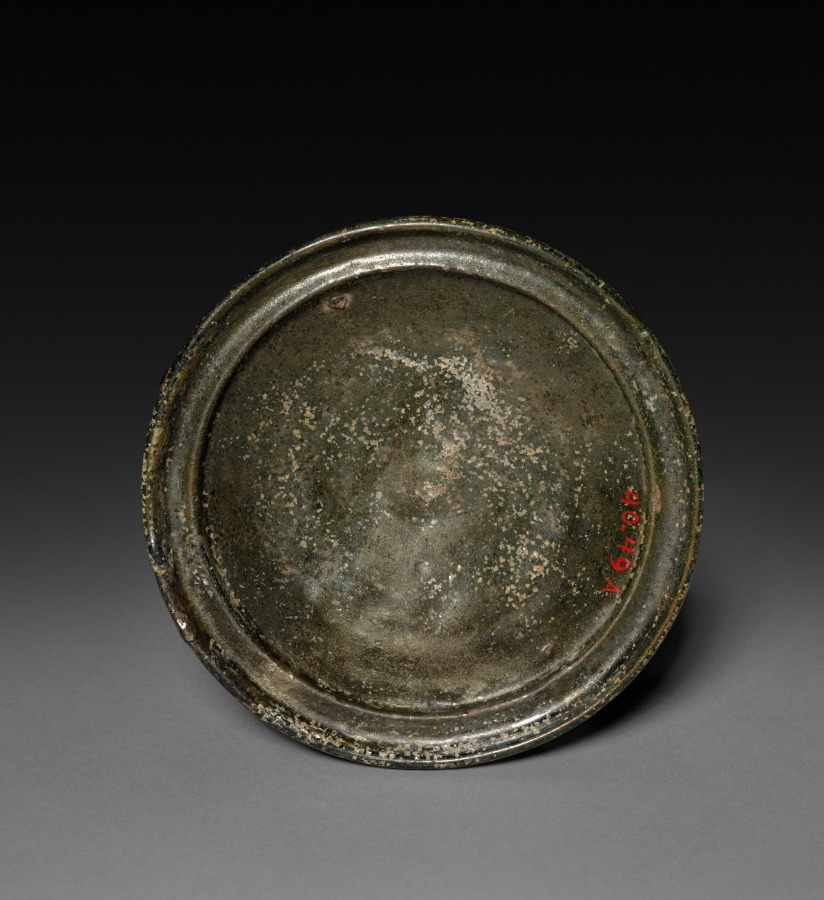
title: Jar with Cover (lid)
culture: China, Han dynasty (202 BCE–220 CE)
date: 206 BCE–220 CE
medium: glazed earthenware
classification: Ceramic